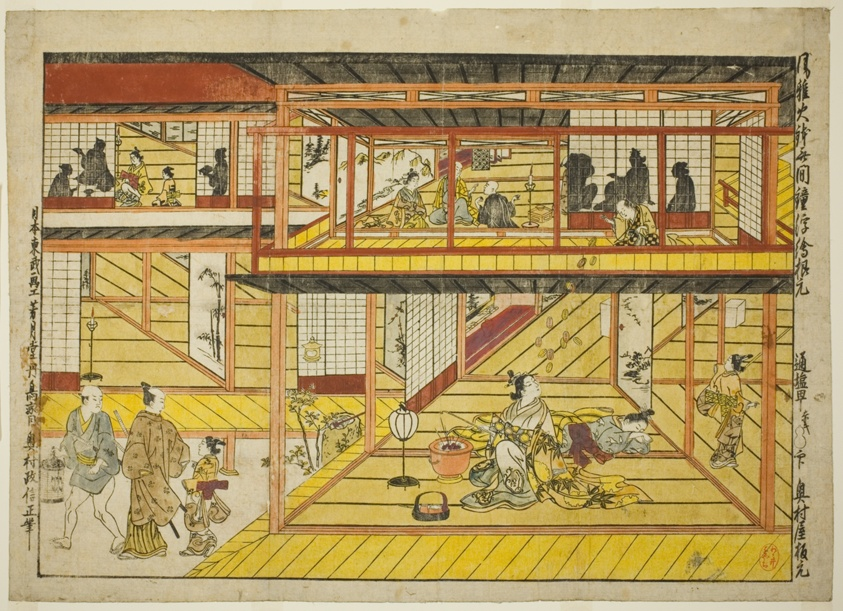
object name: Print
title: The Brazier of Elegance and the Bell of Damnation (Fuga hibachi muken no kane)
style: Japanese (culture or style)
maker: Okumura Masanobu (Japanese, 1686-1764)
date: c. 1739/40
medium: Hand-colored woodblock print; oban, beni-e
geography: Japan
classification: woodblock print; print; asian art